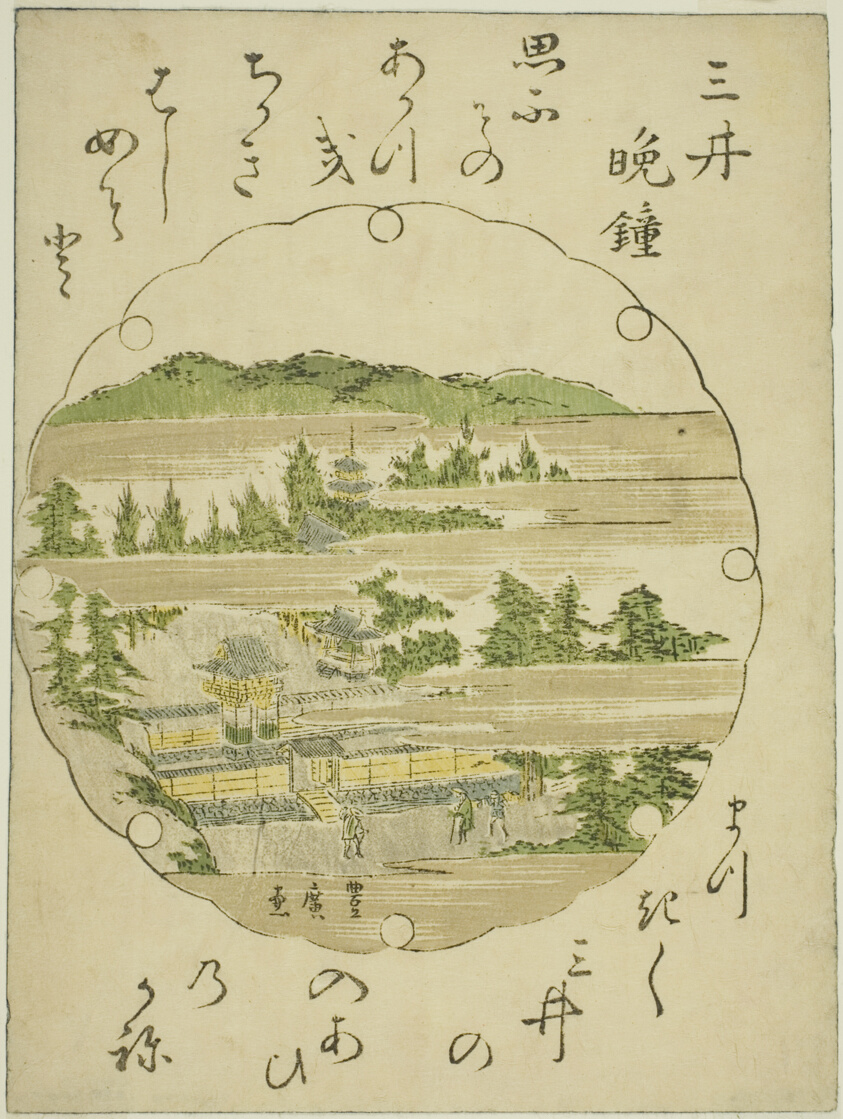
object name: Print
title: Evening Bell at Mii Temple (Mii no bansho), from an untitled series of Eight Views of Omi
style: Japanese (culture or style)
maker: Utagawa Toyohiro (Japanese, 1773-1828)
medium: Color woodblock print; chuban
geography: Japan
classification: woodblock print; print; asian art